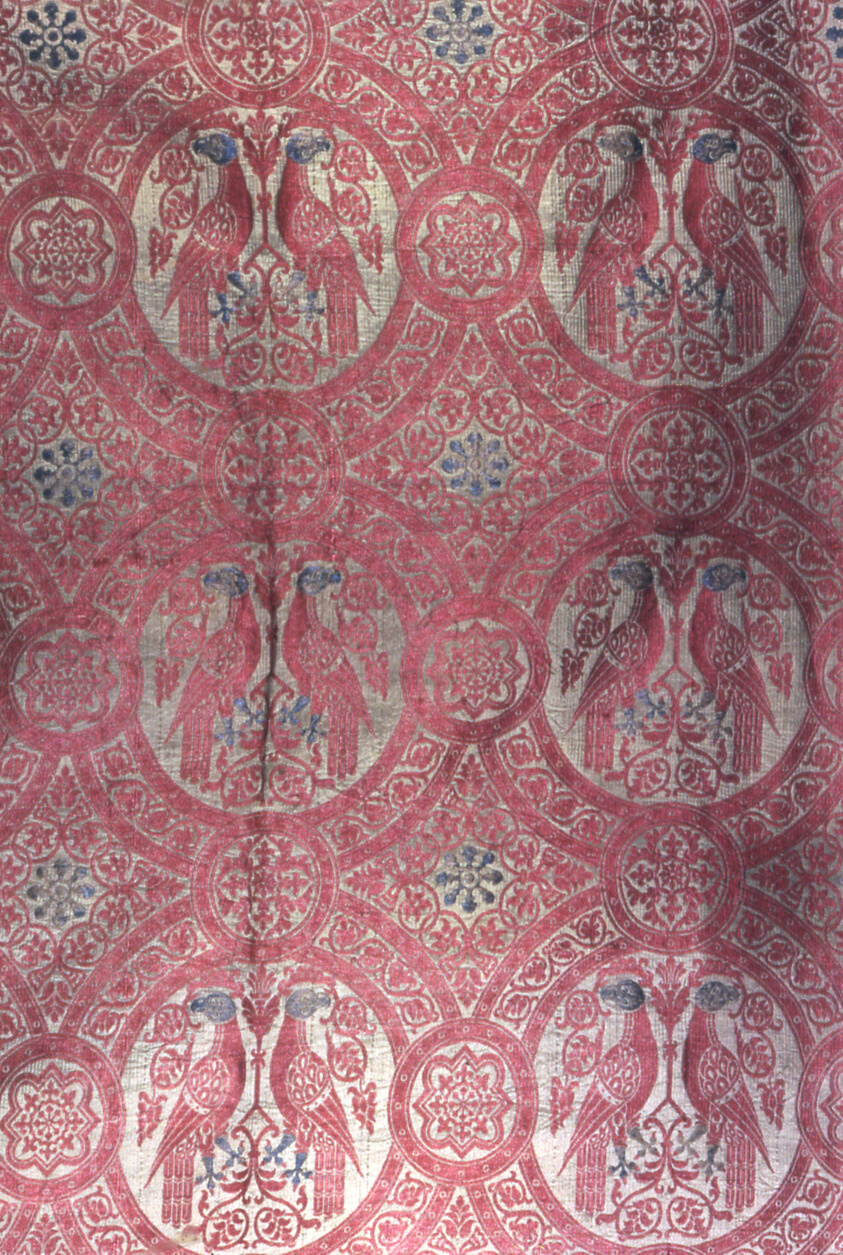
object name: Textile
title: Panel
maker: Italy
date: 19th century (reproduction of 14th century)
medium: Silk and gilt-metal-strip-wrapped silk, plain weave with supplementary patterning and brocading wefts tied by supplementary binding warps in plain interlacing; woven on loom with Jacquard attachment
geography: Italy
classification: textile; weaving